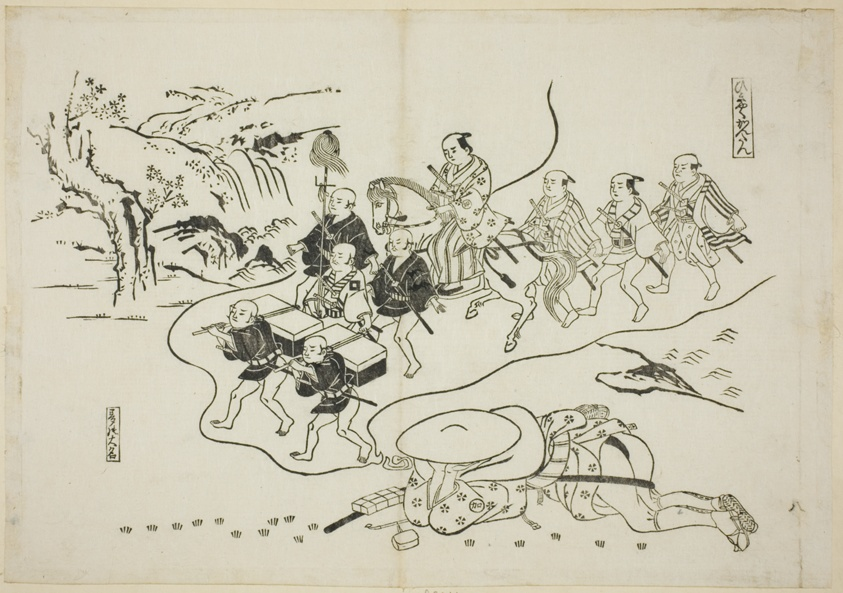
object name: Print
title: The Courier Kantan dreaming of Himself as a Daimyo (Hikyaku Kantan: yume no daimyo), no. 8 from a series of 12 prints depicting parodies of plays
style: Japanese (culture or style)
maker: Okumura Masanobu (Japanese, 1686-1764)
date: c. 1716/35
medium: Woodblock print; oban, sumizuri-e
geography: Japan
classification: woodblock print; print; asian art; woodblock